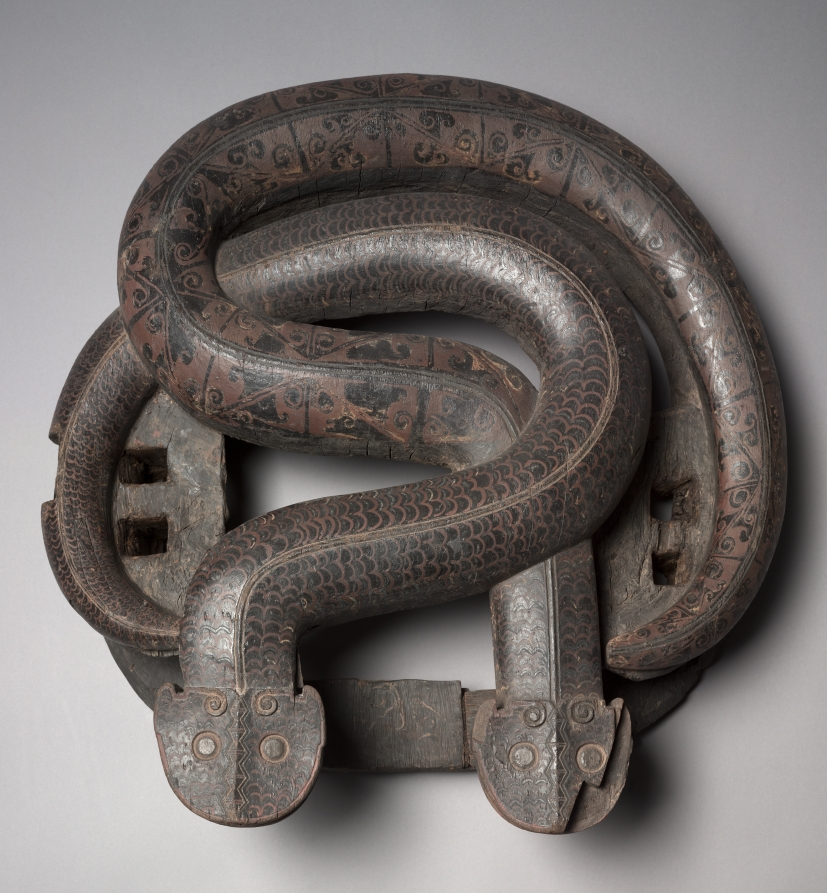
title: Cranes and Serpents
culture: China, reportedly from Hunan province, Changsha, Warring States period (475–221 BCE), State of Chu (c. 1046–223 BCE)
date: 475–221 BCE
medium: lacquered wood with polychromy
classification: Sculpture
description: A different style of ritual art developed in the state of Chu in South China. In addition to bronze vessels, lacquered wood artifacts expanded the repertory of ritual implements. This extraordinary sculpture was probably a drum stand for supporting a suspended drum in ritual ceremonies. It is unique among other excavated drum stands of the Chu, which typically show two birds standing on tigers. The theme of the bird stepping on the serpent was common in the Chu visual culture. Yet the slender proportions and seemingly flimsy structure of this particular set raise the question of whether it was utilitarian or mostly served symbolic functions in the tomb. The birds' and serpents' bodies have designs painted in red lacquer and yellow pigment against the black lacquer. Scientific analyses confirm the additional use of a blue or green pigment that has been discolored over time.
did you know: The cranes' long necks allowed a lightweight drum to be suspended from strings through the beaks, while the densely intertwined snakes provided a weighty base to stabilize the object during musical performances.